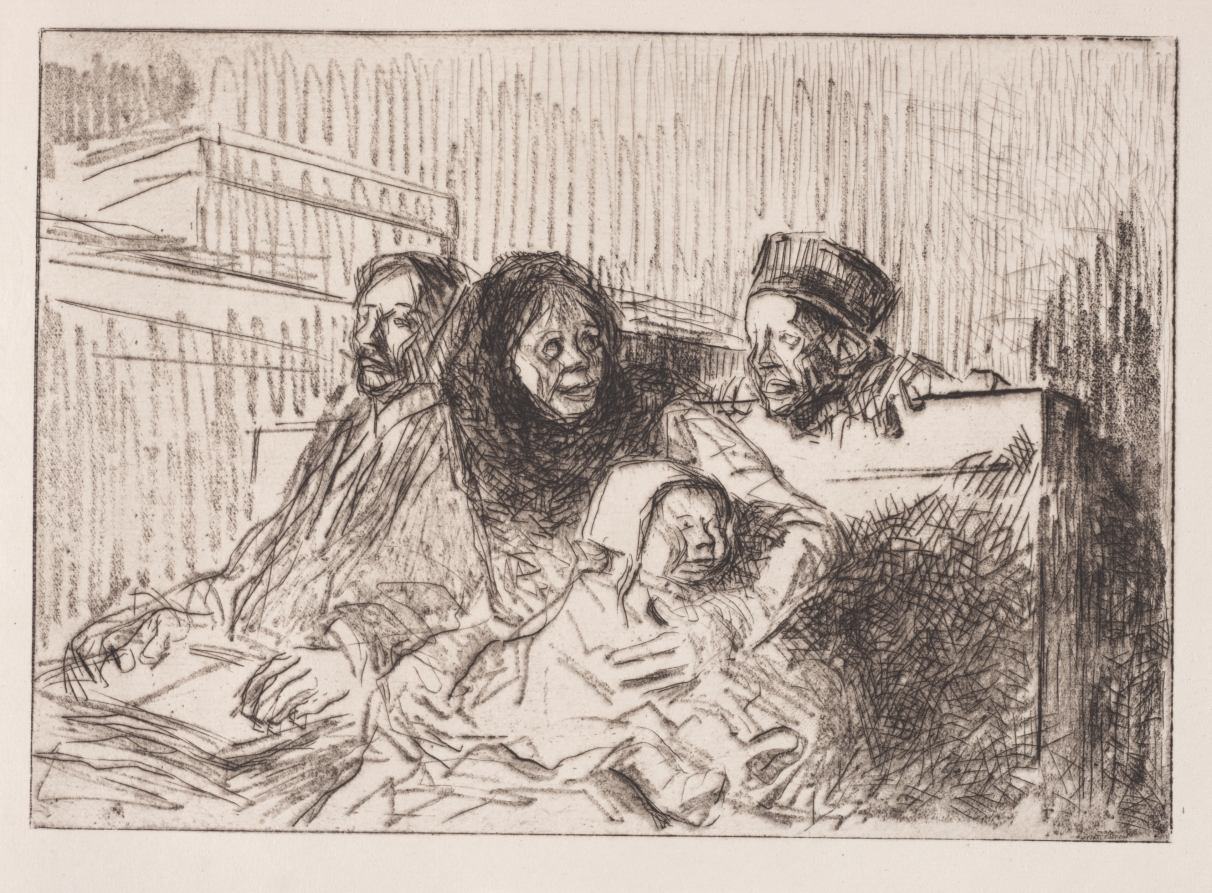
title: Temoins à l'audience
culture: France, 20th century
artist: Jean Louis Forain (French, 1852–1931)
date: 1908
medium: etching and crayon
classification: Print